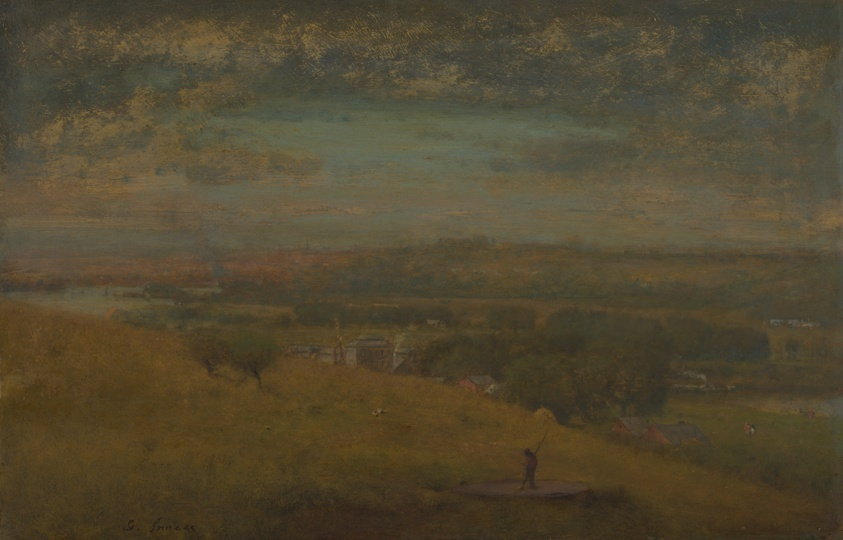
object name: Painting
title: Delaware Valley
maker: George Inness (American, 1825–1894)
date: c. 1865–75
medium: Oil on artist's board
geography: United States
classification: painting; american arts